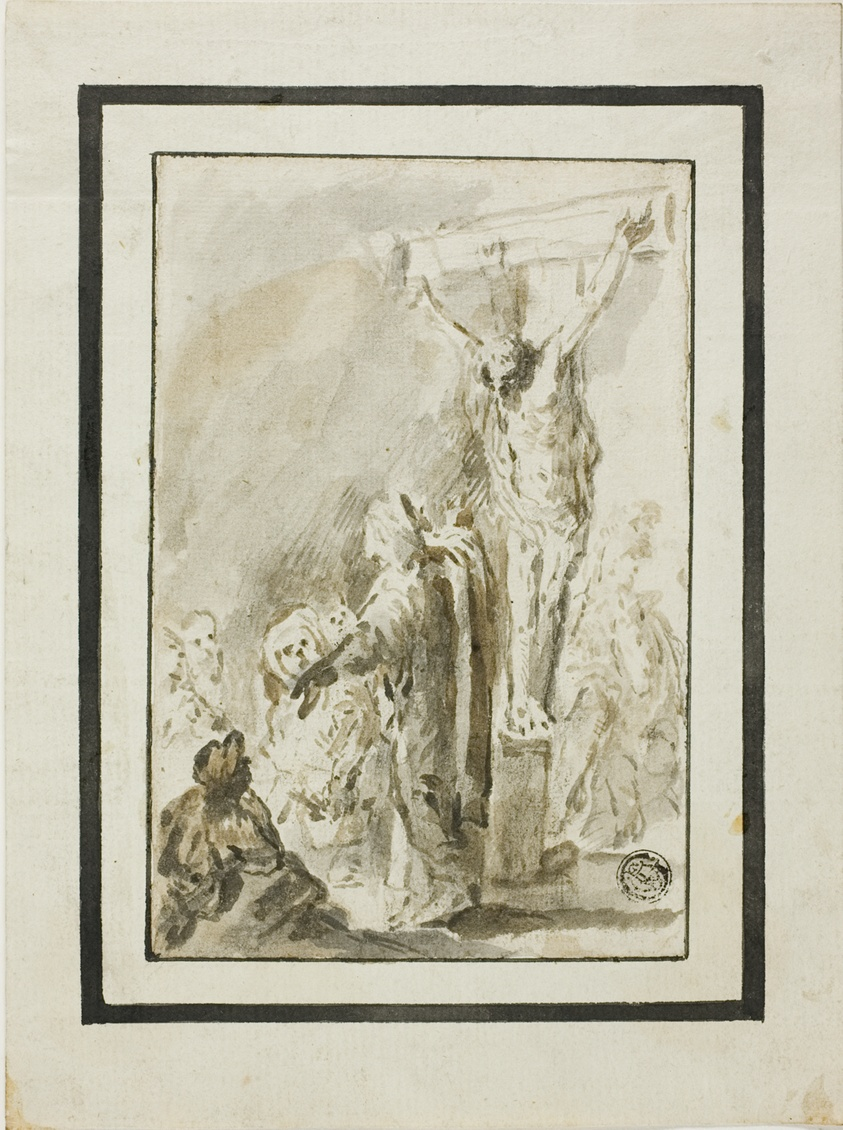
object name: Drawing and Watercolor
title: Crucifixion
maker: Unknown Artist; Flanders/Flemish, 1600-1699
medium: Brush and brown and gray wash, over black chalk, on ivory wove paper, laid down on ivory laid paper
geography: Flanders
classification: ink or chalk wash; drawings (visual works); prints and drawing